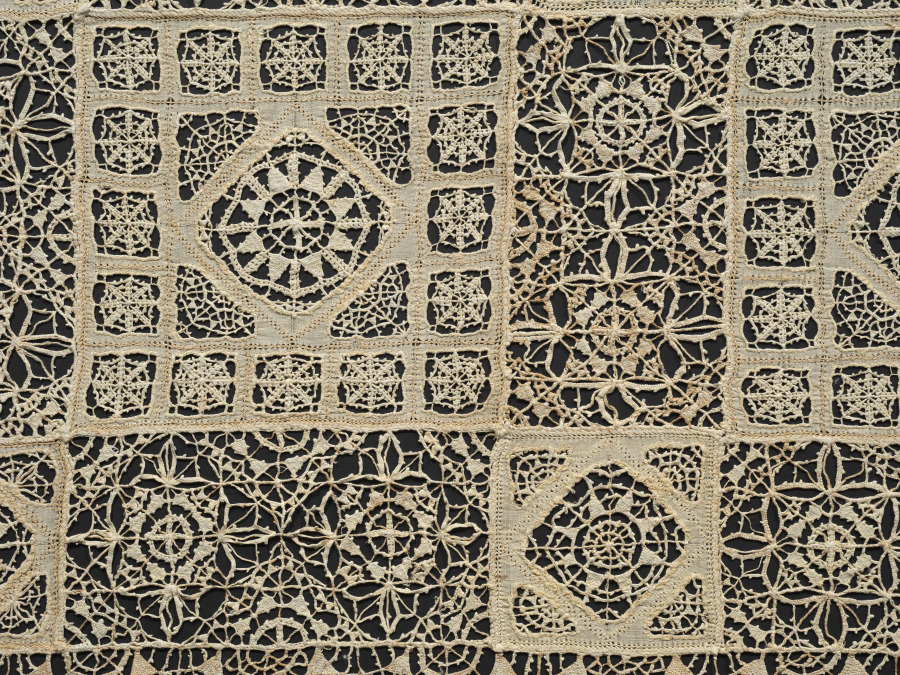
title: Lace Cloth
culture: Italy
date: 1560–1600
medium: Linen; needle lace (cutwork and reticella)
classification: Lace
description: Consisting of more than 80 squares of cutwork (a cut and embellished linen ground) and rectangles of reticella (needle lace), this luxurious cover could have been made by a single person or several people who divided the work. Close looking reveals that the cloth is made with threads of two very slightly different colors: bleached and unbleached linen. Together the sections resemble snowflakes, which are of similar shape and size but vary subtly from one another. The perplexing dark stitches in the upper left corner do not repair damage, and might be the maker’s signature.